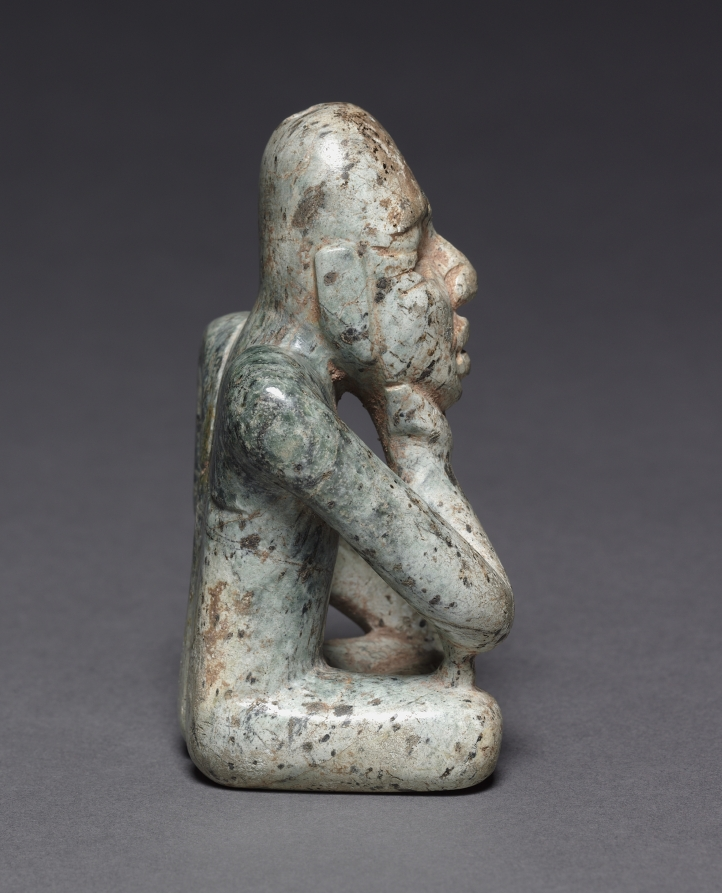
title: Seated Figure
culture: Mesoamerica, Mexico, Olmec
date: 1200–300 BCE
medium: jade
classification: Jade